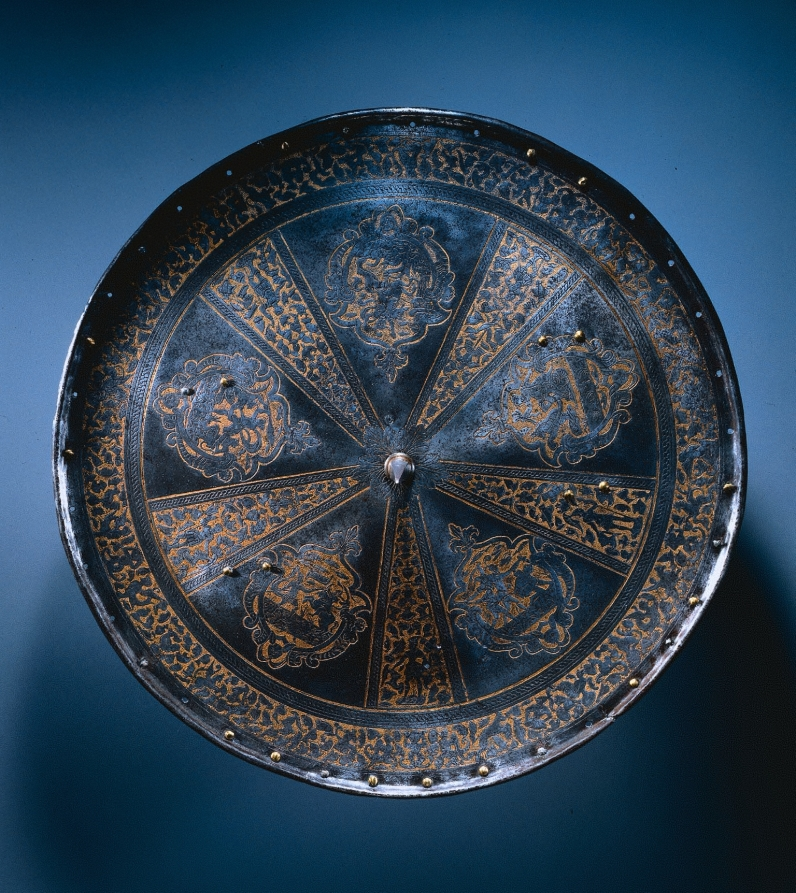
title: Rondache (Round Shield)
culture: Italy, Milan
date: c. 1570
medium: etched and gilded steel with brass rivets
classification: Arms and Armor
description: Highly decorated circular shields like this one were a specialty of the city of Milan. This shield would have originally belonged to an armor that would have been decorated to match - with radiating etched bands of classical warriors and trophies.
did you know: The escutcheons, or small shields radiating around the center, contain scenes of mythical combat; during the Renaissance there was often a preoccupation with the antique world.